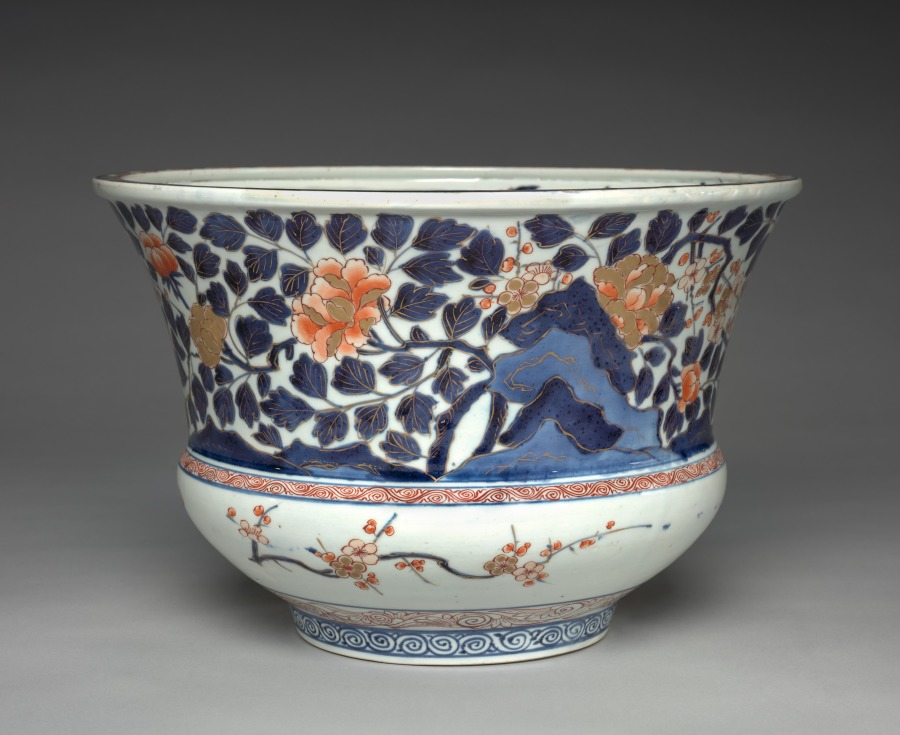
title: Vase (Imari ware)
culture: Japan, Edo period (1615–1868)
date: c. 1700s–1800s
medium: underglaze blue with overglaze red porcelain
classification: Ceramic